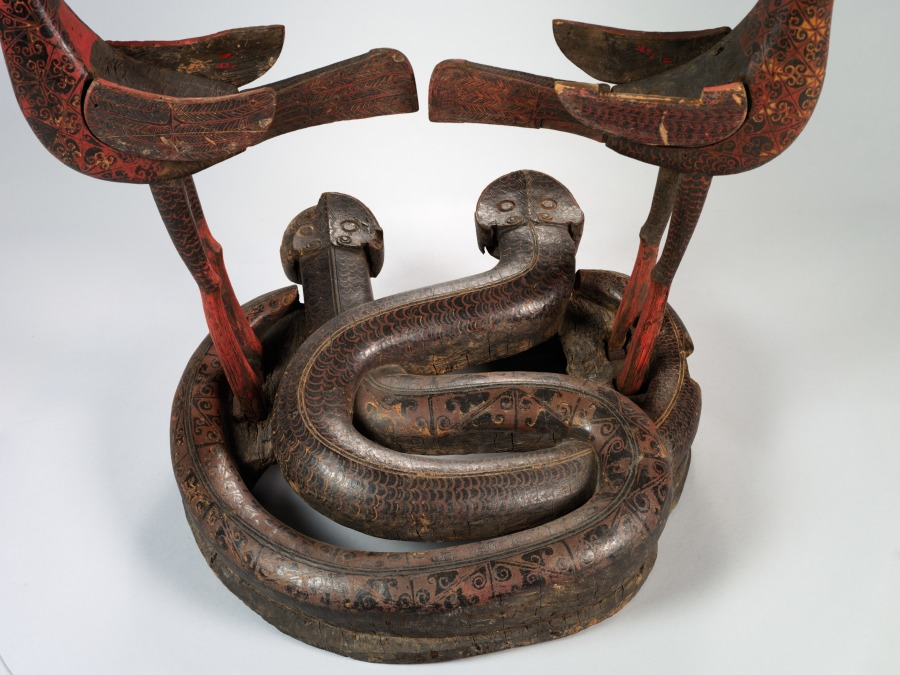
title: Cranes and Serpents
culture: China, reportedly from Hunan province, Changsha, Warring States period (475–221 BCE), State of Chu (c. 1046–223 BCE)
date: 475–221 BCE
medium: lacquered wood with polychromy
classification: Sculpture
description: A different style of ritual art developed in the state of Chu in South China. In addition to bronze vessels, lacquered wood artifacts expanded the repertory of ritual implements. This extraordinary sculpture was probably a drum stand for supporting a suspended drum in ritual ceremonies. It is unique among other excavated drum stands of the Chu, which typically show two birds standing on tigers. The theme of the bird stepping on the serpent was common in the Chu visual culture. Yet the slender proportions and seemingly flimsy structure of this particular set raise the question of whether it was utilitarian or mostly served symbolic functions in the tomb. The birds' and serpents' bodies have designs painted in red lacquer and yellow pigment against the black lacquer. Scientific analyses confirm the additional use of a blue or green pigment that has been discolored over time.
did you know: The cranes' long necks allowed a lightweight drum to be suspended from strings through the beaks, while the densely intertwined snakes provided a weighty base to stabilize the object during musical performances.